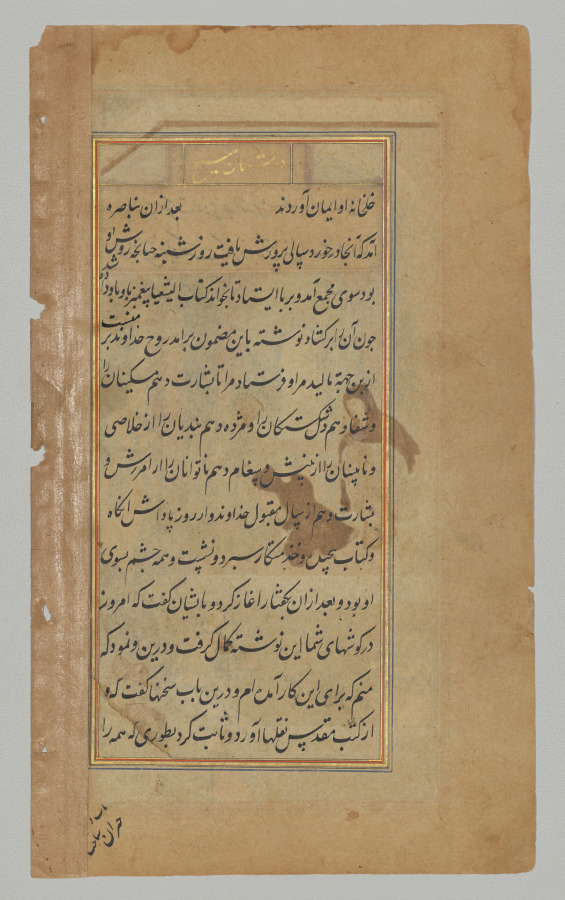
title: Jesus Heals the Nobleman’s Son in Capernaum (folio 70 recto), from a Mirror of Holiness (Mir’at al-quds) of Father Jerome Xavier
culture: Mughal India, Allahabad, made for Prince Salim (1569–1627)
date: 1602–4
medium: Gum tempera, ink, color, and gold on paper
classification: Manuscript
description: The diminutive figure wearing green in the center of the composition is the young son of a nobleman who was dying. Jesus healed him from afar so quickly that the subsidiary figures at the periphery of the scene are still anxious and bringing pots of remedies. This painting is unfinished; the border of the carpet and the geometric tile patterns on the floor of the forecourt have not been painted. An unknown number of artists with different backgrounds, skills, and experience contributed to this project, and even this work appears to be by at least two different hands.